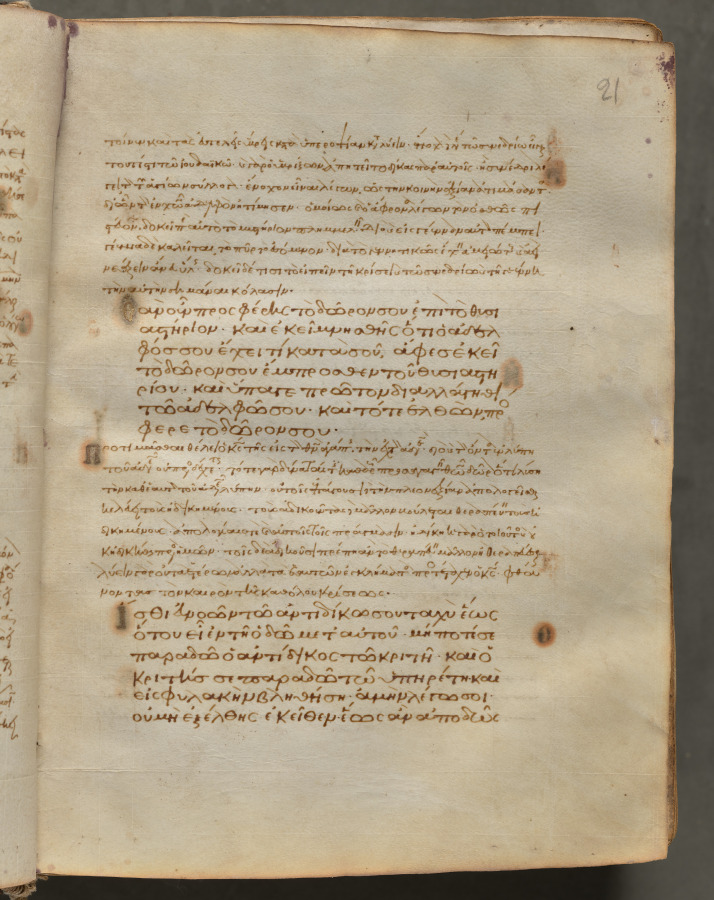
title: Text, folio 21 (recto), from a Gospel Book with Commentaries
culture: Byzantium, Constantinople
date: c. 1000–1100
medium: ink, tempera, and gold on vellum; leather binding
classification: Bound Volume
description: Each of the four gospels in this book opens on a page with brilliantly illuminated borders depicting the author of the text as well as birds-principally peacocks, symbols of the immortality of the soul-and fountains, representing the fountain of life and the salvation of the soul. This volume consists of 428 leaves with texts in Greek. Its level of sophistication suggests that it was probably written and decorated in a monastery in Constantinople.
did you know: Gospel Books were carried in procession through Byzantine churches.